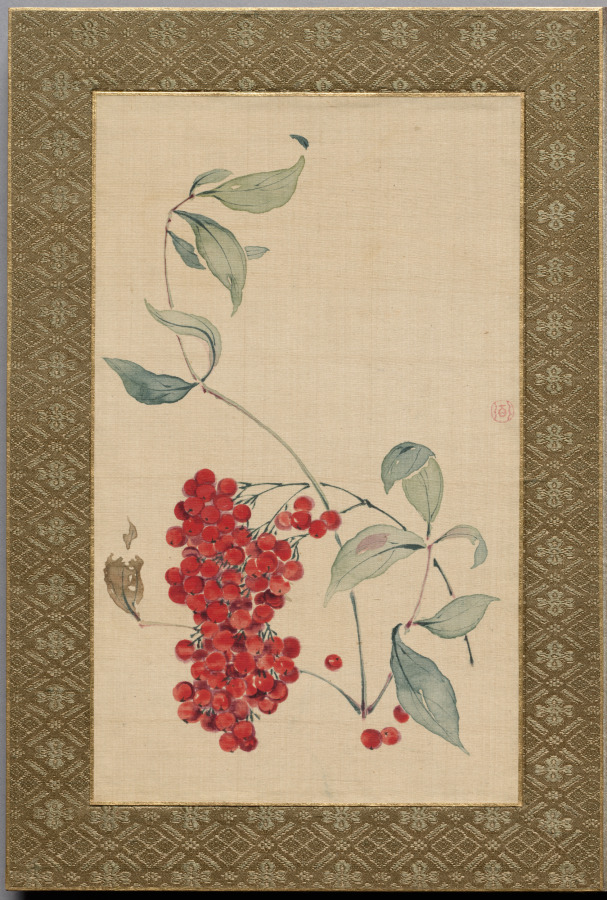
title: Painting from Flowers and Grasses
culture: Japan, Edo period (1615–1868)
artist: Tsubaki Chinzan (Japanese, 1801–1854)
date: 1841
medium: album; ink and color on silk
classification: Painting